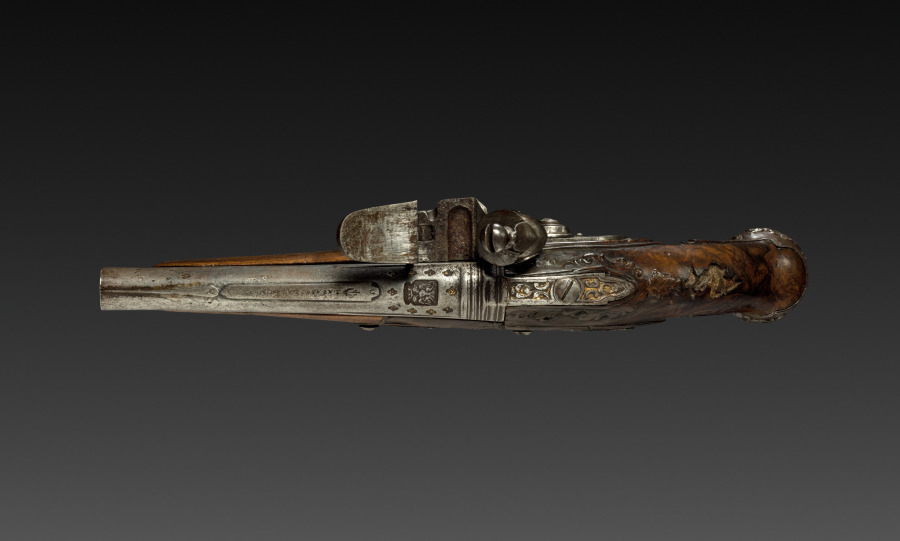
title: Flintlock Pistol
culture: Italy, Brescia, 18th century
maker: Bortolo Agazzi (Italian)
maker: Lazaro Lazarino (Italian)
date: 1700s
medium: steel with traces of gilding; walnut stock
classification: Arms and Armor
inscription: on lock: Bortolo Agazzi; on barrel: Lazaro Lazarino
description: The flintlock was the most popular style of lock in all of Europe in the mid 1600s through the 1700s except in Spain and Italy where the snaphance was more dominant. This pistol's shine comes from the gold that was applied to the steel shaft. This shiny surface is set off by the rich walnut stock. Upon close inspection, you can see areas of damage to the walnut and even a missing section of decoration on the rear of the handle.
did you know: The term flintlock is used to describe any firearm that uses a flint-striking ignition mechanism.